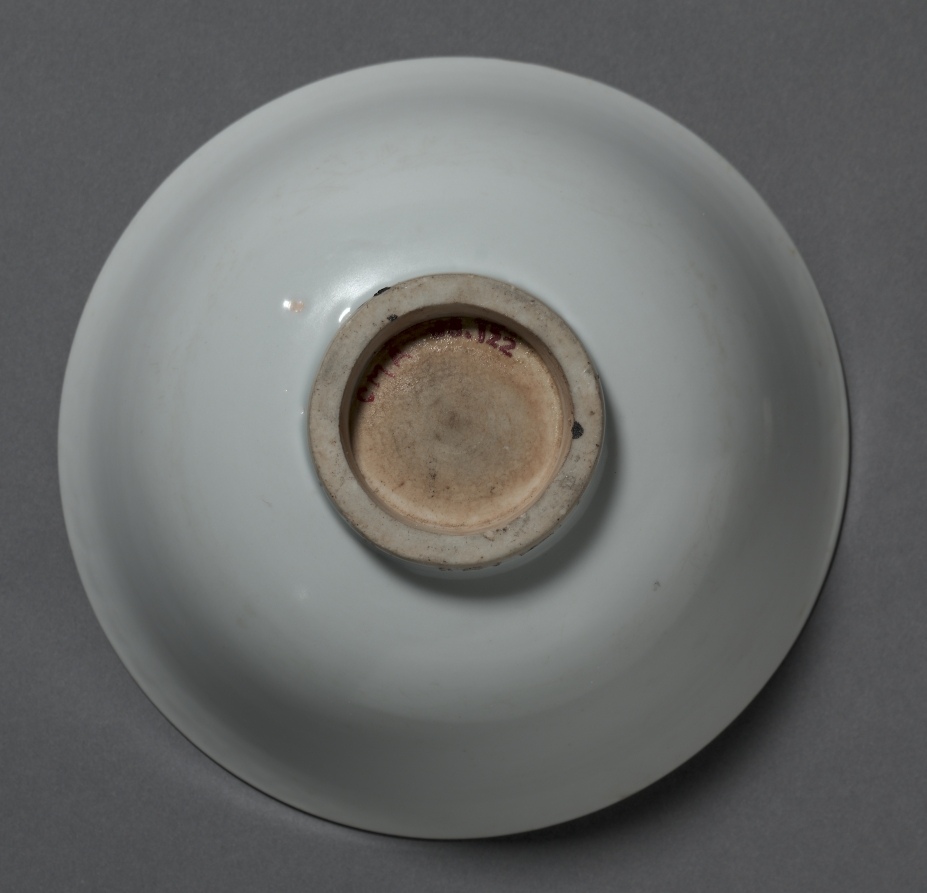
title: Bowl with Flower Petals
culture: China, Jiangxi Province, Jingdezhen, Yuan dynasty (1271–1368)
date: 1300s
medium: glazed porcelain with molded decoration, Shufu ware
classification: Ceramic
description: Yuan dynasty Shufu ware was a further development of the earlier qingbai ware and is characterized by a more heavily constructed body, opaque white glaze, molded decoration, and at times the inscription Shufu that gives the ware its name. Although lacking the inscription here, this bowl possesses the characteristics and decoration of Shufu pieces.